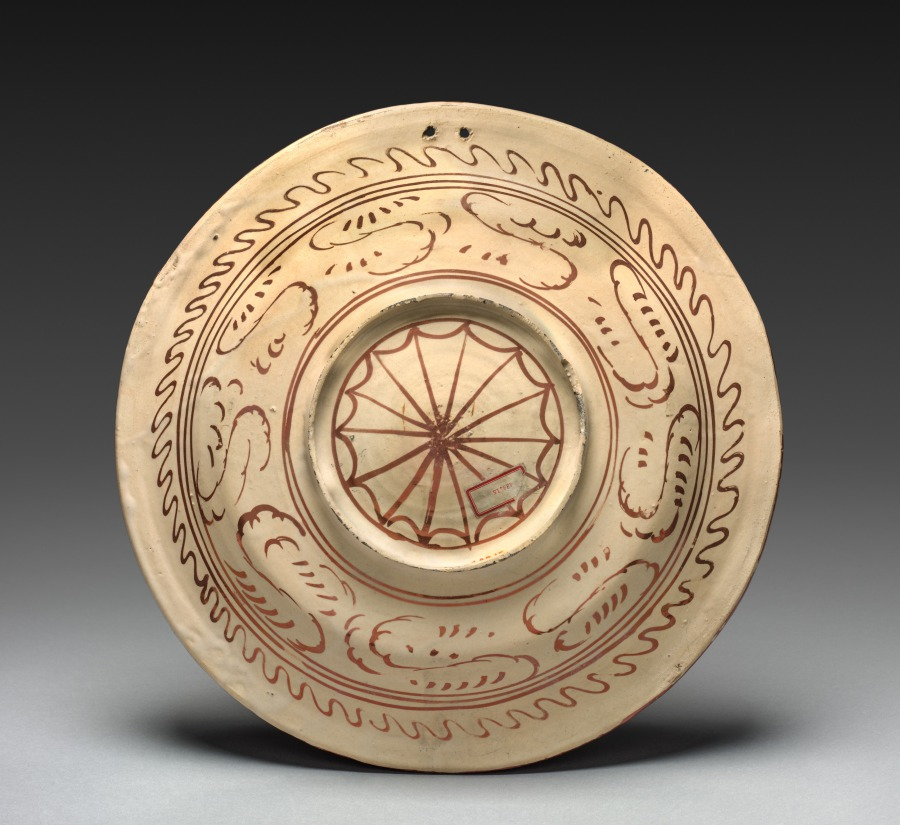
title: Dish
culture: Spain, probably Valencia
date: c. 1475–1500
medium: Tin-glazed earthenware with luster-painted design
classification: Ceramic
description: Alternating leaves and pomegranates circle the rim of this dish, emerging from the swirling vegetal motif in the background. The pomegranate is a common decorative element in Islamic art. It is mentioned in the Qur’an as one of the fruits of paradise and is prized for its beauty and nutritional benefits. The use of the pomegranate on this luminous dish may indicate that it was produced for the court of the Nasrid dynasty (1232–1492) in Spain. The palace of Alhambra, the seat of power for the emirs, dynastic Muslim rulers, from the early 1300s, is in Granada, which translates to pomegranate.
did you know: A wine cup in the center of the dish evokes the pleasures of a feast.